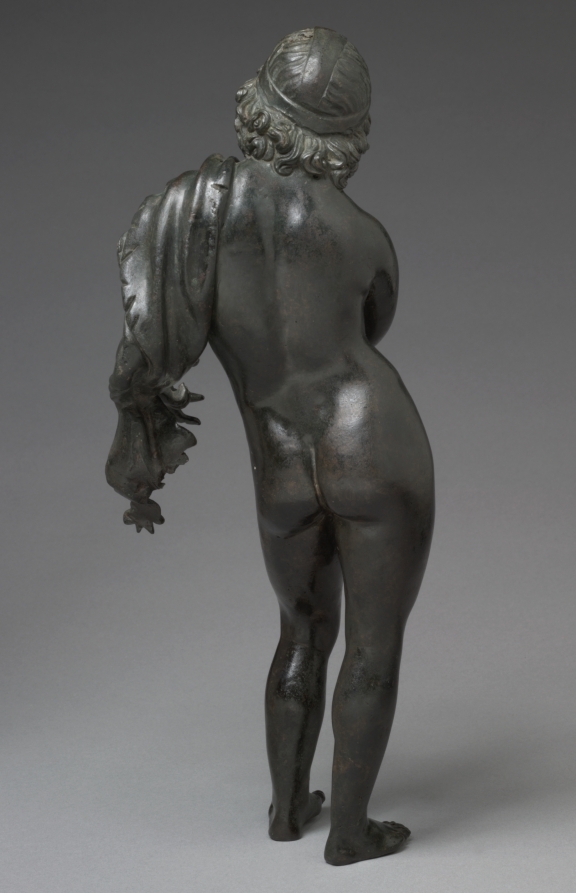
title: Statuette of Harpocrates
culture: Greece, Greco-Roman Period, late Ptolemaic Dynasty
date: c. 50 BCE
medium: bronze, hollow cast, with silver inlays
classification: Sculpture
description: Combining Hellenistic naturalism with a finger gesture associated with childhood in Egyptian tradition, this young figure represents Harpocrates, the Greek form of the Egyptian child sun god Horus, or Hor-pa-khred. A hole atop his head likely once held a double crown of Egypt, as on more traditionally Egyptian representations of Harpocrates.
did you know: The gesture this figure makes refers to the Egyptian hieroglyph for child, nn, 𓀁.